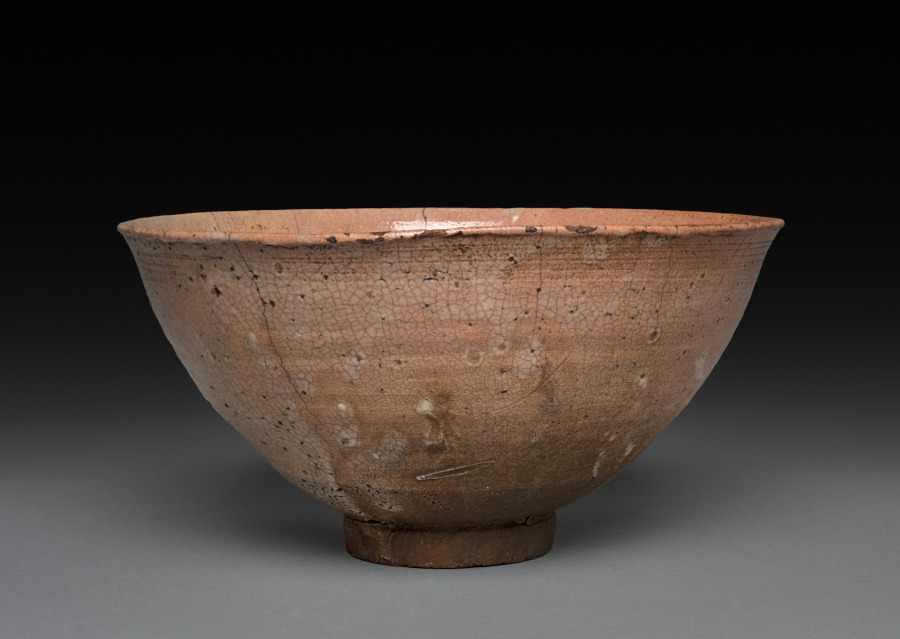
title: Tea Bowl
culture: Japan, Momoyama period (1573–1615)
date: c. 1600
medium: Glazed stoneware (Karatsu ware)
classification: Ceramic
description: Wide-mouthed bowls were used for consuming whipped tea such as that imbibed during the tea ceremony. Karatsu ware like this was among the most prized of such tea bowls. The port city of Karatsu in Saga prefecture in Kyushu was known for its kilns that produced high-fired, Korean-style glazed pottery. The Japanese ruler Toyotomi Hideyoshi invaded Korea in 1592 and 1597, returning with families of Korean potters as spoils of war. This region was one of the sites where these potters were resettled.